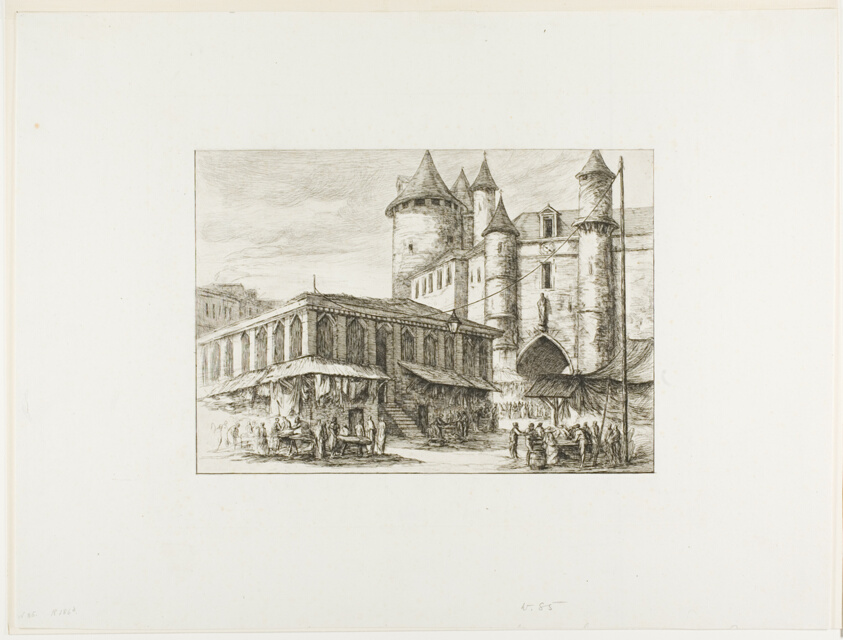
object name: Print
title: The Grand Châtelet, Paris, c. 1780, after an earlier drawing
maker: Charles Meryon (French, 1821-1868)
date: 1861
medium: Etching and drypoint on ivory laid paper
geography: France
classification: etching; print; prints and drawing